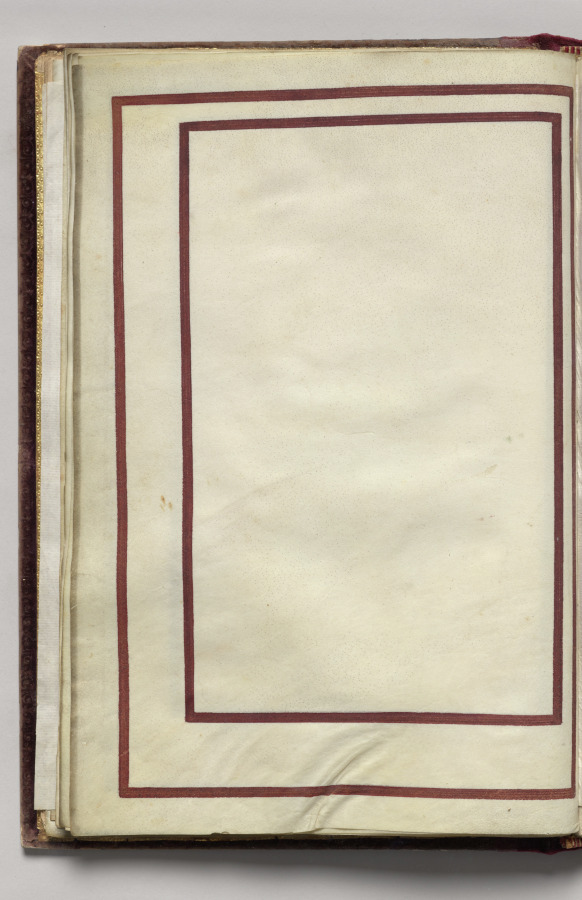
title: Border, folio 12 (verso), from Florilegium (A Book of Flower Studies)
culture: France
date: 1608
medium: watercolor, ink, silver and gold over occasional traces of pencil, on vellum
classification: Bound Volume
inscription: Dated: Poitiers 1608 (on frontispiece) Signed: On frontispiece in black ink, lower right: Van Kuyk Notation on drawing: Frontispiece: in pencil, lower margin: * élève de Van Kessel, peintre flammand (* in pencil also appears in front of Van Kuyk's name).